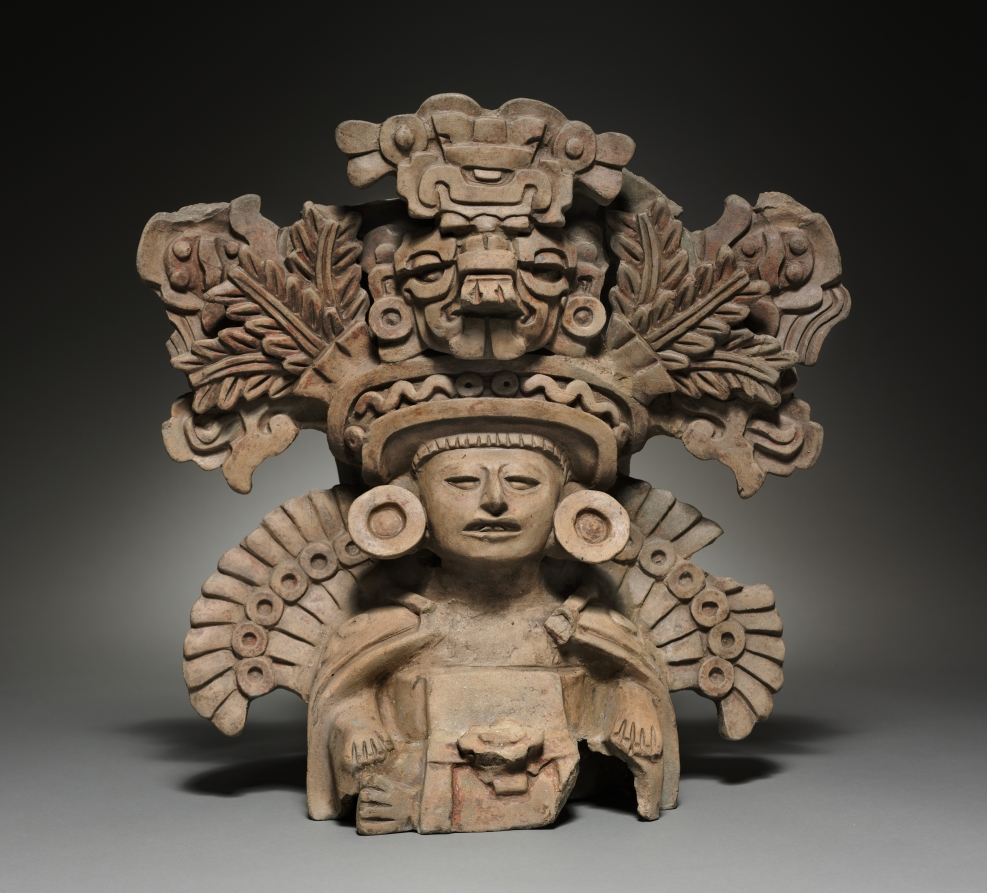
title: Funerary Urn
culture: Mexico, Oaxaca, Zapotec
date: 350–500 CE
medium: terracotta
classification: Sculpture